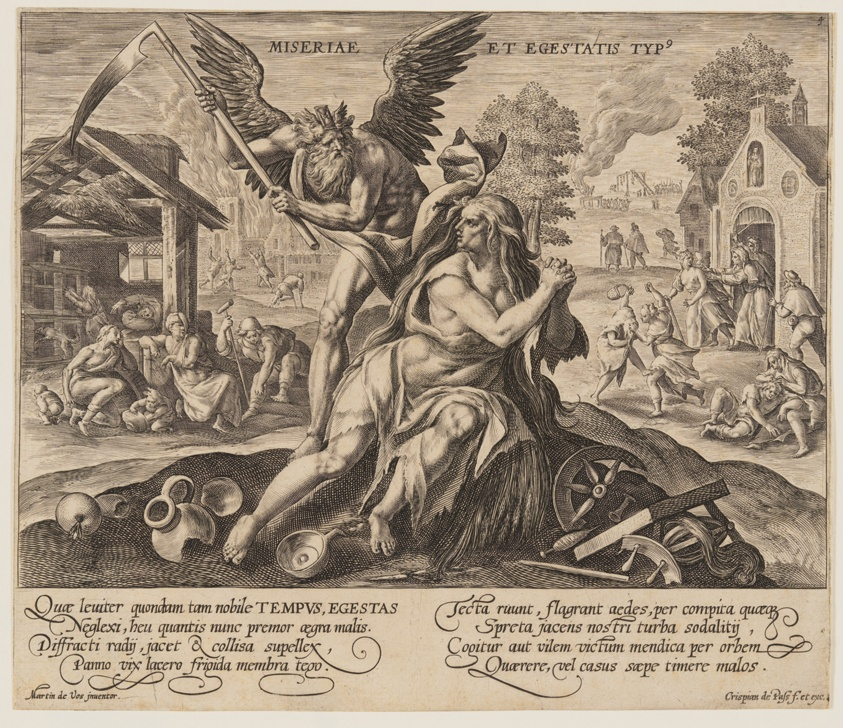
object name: Print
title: Miseriae est Egestatis Typus, from Time with Virtues and Vices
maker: Crispijn van de Passe I (Dutch, c. 1565–1637); after Maarten de Vos (Flemish, 1532–1603)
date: c. 1600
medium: Engraving on ivory laid paper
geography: Netherlands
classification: engraving; paper; print; prints and drawing